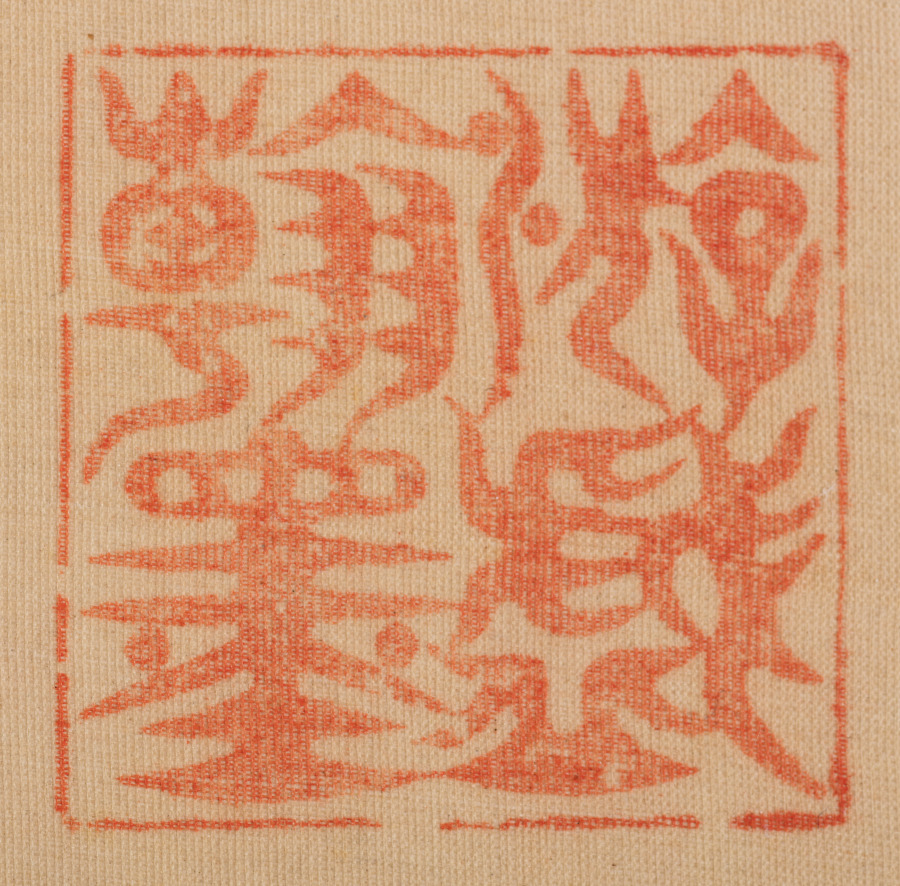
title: Orchids and Rocks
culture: Korea, Joseon dynasty (1392–1910)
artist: Yi Ha-eung (Korean, 1820–1898)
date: 1897–98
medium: Eight-panel folding screen; ink on silk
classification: Painting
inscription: Translation: [I] painted for the high minister Yangwon. [I] humbly request your corrections and advice [on my painting]. [By] an eighty-year old gentleman of rocks.)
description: Yi Ha-eung (1820−1898), the artist of this eight-panel folding screen, was one of the most influential men in late 19th-century Korea. Acting as the regent for his son, King Gojong (1852−1919), who ascended the throne at the age of thirteen, Yi ruled Korea from 1866 to 1873. In addition to his illustrious political career, Yi was also recognized as one of the most celebrated artists who led the revival of literati art in late 19th-century Korean art. In particular, he was recognized as the master of orchids, one of the “Four Gentlemen” (plum, orchid, chrysanthemum, and bamboo) themes. Solely relying on monochrome ink, Yi depicted the curvilinear silhouettes of cymbidium orchid leaves dramatically hanging down from cliffs. Growing in wilderness and redolent with fragrance, orchids were often associated with the perseverance of principled gentlemen, and thus became one of the most popular subjects of scholar-artists' paintings.On the upper right corner of the far left panel, Yi wrote a short inscription stating that he painted the work at the age of 80.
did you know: The artist of this elegant painting is the formidable politician Yi Ha-eung (1820–1898), who is known for a seclusion policy that aimed to protect Korea and its sovereignty from foreign influences.